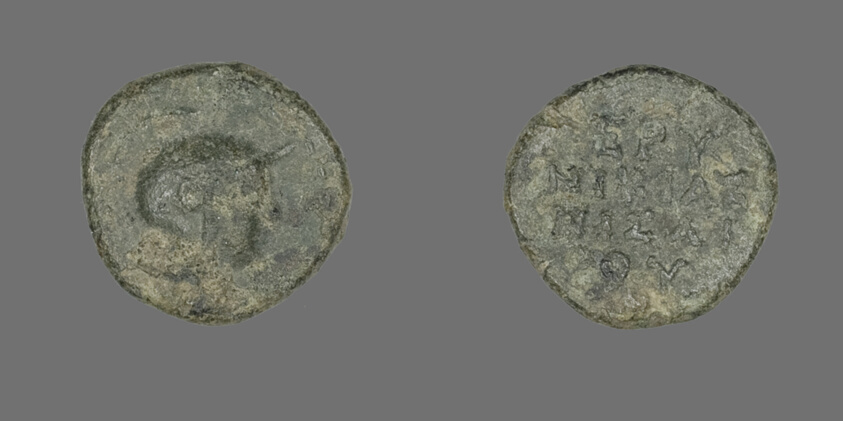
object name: Coin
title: Coin Depicting the Goddess Athena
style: greek, ancient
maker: Greek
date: 300-200 BCE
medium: Bronze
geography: Ancient Greece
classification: coin; ancient art